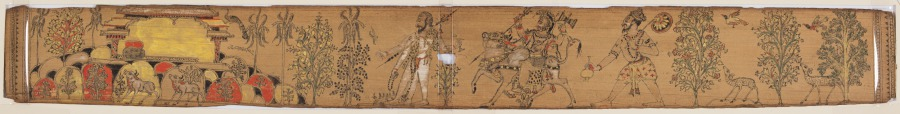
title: A Prince Performs Austerities (recto); Shiva and His Followers Return to Mount Kailash (verso), from a Romance of Chandrabhanu and Lavanyavati of Upendra Bhanja (1670–1740)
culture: Eastern India, Odisha (formerly Orissa)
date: 1700s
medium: gum tempera and lampblack on palm leaf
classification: Painting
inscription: kailasakandara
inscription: 1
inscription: e pancagni gartta acchi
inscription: e rajāpua tapasā kari sivapūjā kari acchi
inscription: agni jalum accchi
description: In this illustration from the beginning of a popular romance, a prince performed intense austerities and devotions to the Shiva linga in order to obtain a divine woman. He practices yoga surrounded by fires during the hot season and wanders unsheltered during monsoon, as seen on the recto. On the verso, Shiva has answered his prayers and returns home to his "cave on Mount Kailash," as stated in the inscription.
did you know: There is a three-legged yogi on the verso.